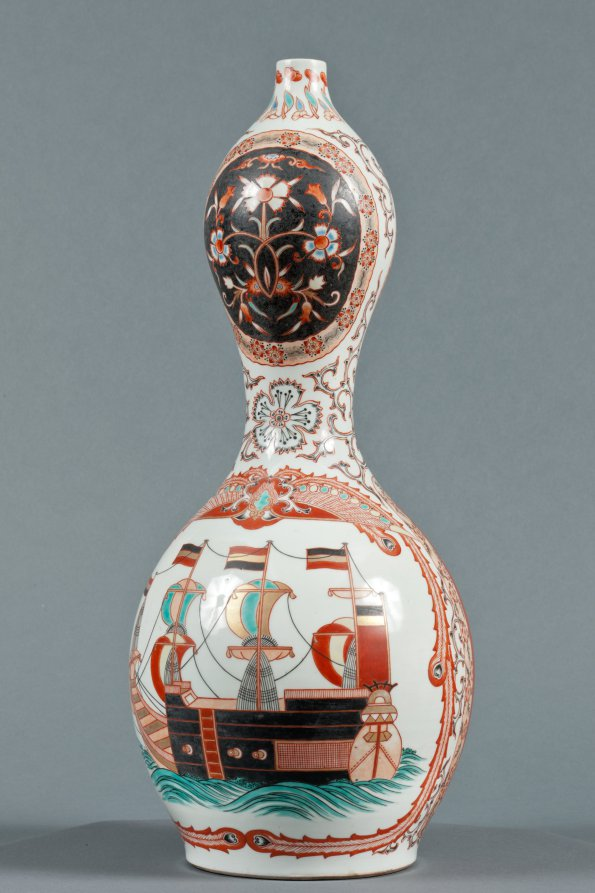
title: Bottle with Western Ships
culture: Japan, Edo period (1615–1868)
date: c. 1800–1868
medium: Porcelain with decoration in colored enamels and underglaze blue, overglaze enamels, and gold (Hizen ware, Arita type)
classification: Ceramic